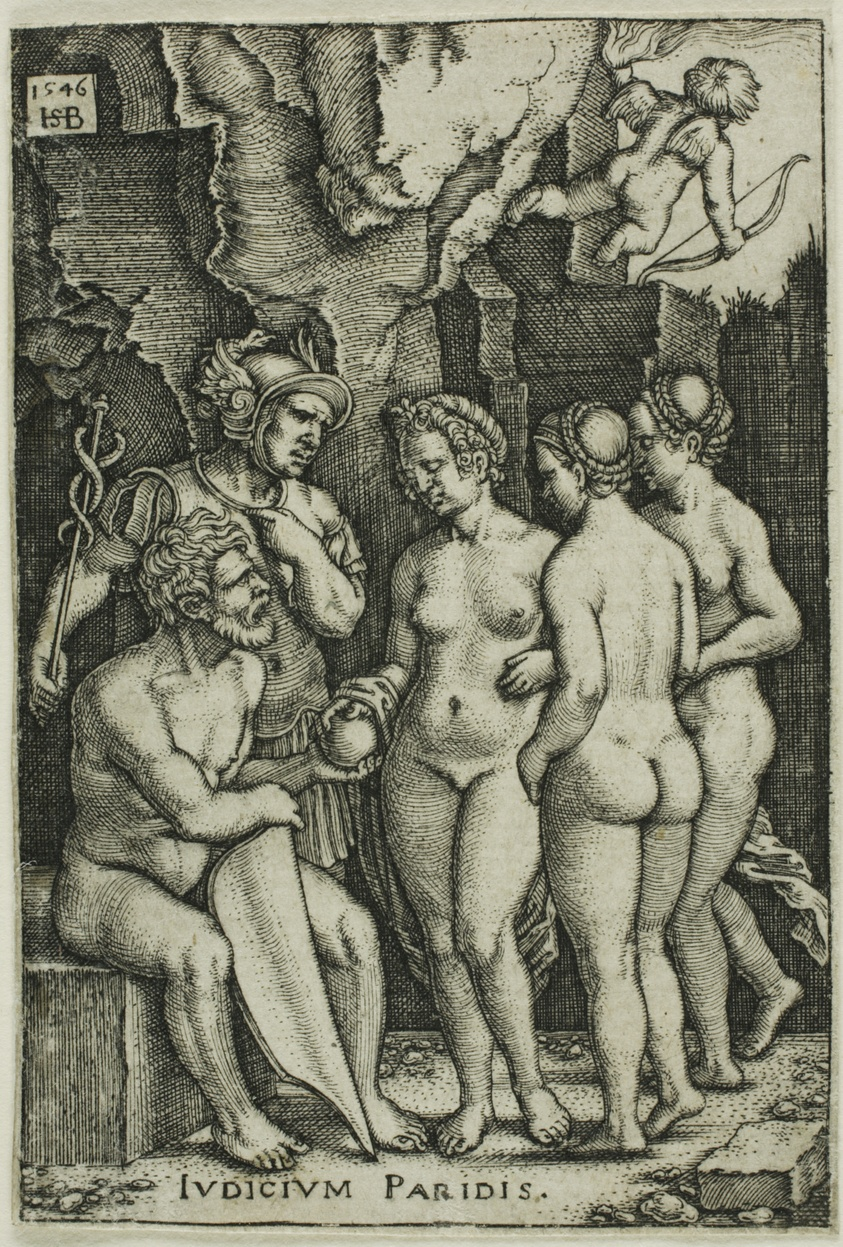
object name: Print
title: The Judgment of Paris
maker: Sebald Beham (German, 1500-1550); after Barthel Beham (German, 1502-1540)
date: 1546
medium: Engraving in black on ivory laid paper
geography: Germany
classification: engraving; print; prints and drawing